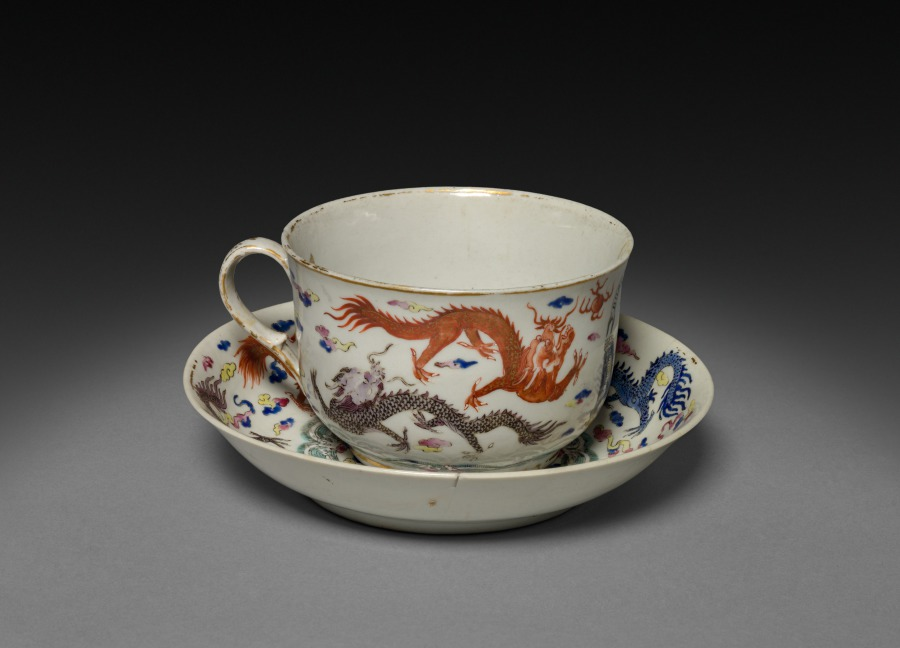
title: Cup and Saucer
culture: China, Chinese Export, 18th century, Period of Kien Lung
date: c. 1750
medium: porcelain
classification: Ceramic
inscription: in a curved band above the castle: "Burgus De Newbury."